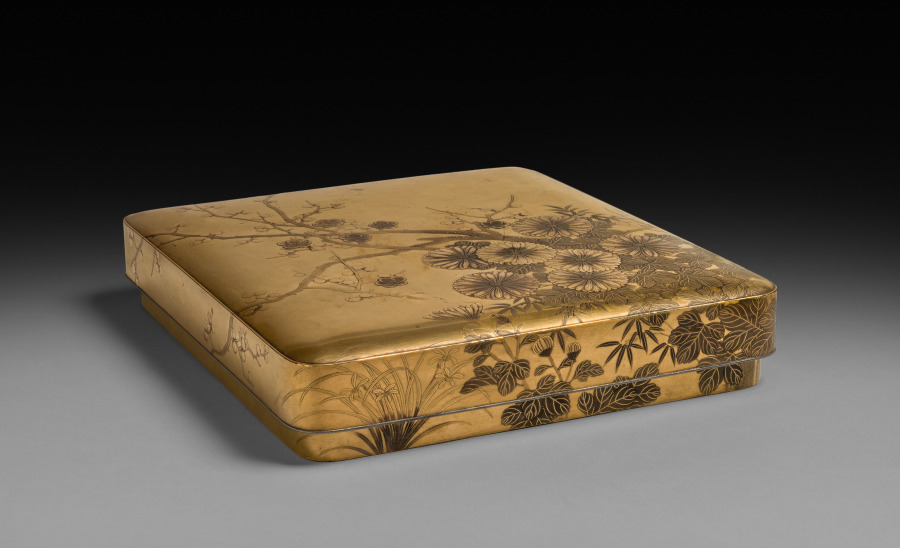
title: Writing Box (Suzuribako) with Chrysanthemum and Plum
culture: Japan, Meiji period (1868–1912)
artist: Sasaki Takayasu (Japanese, 1845–1929)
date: late 1800s-early 1900s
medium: Lacquer over wood with gold and silver sprinkled powder (maki-e)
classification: Lacquer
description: Both functional and elegant, this is a container for an ink stone, brushes, and ink from a set of writing tools that included a larger box for paper. Against a sleek gold lacquered ground, its artist has used restraint in sprinkled powder decoration (maki-e) to produce the design of cockscomb and harvested rice on the interior of the lid.